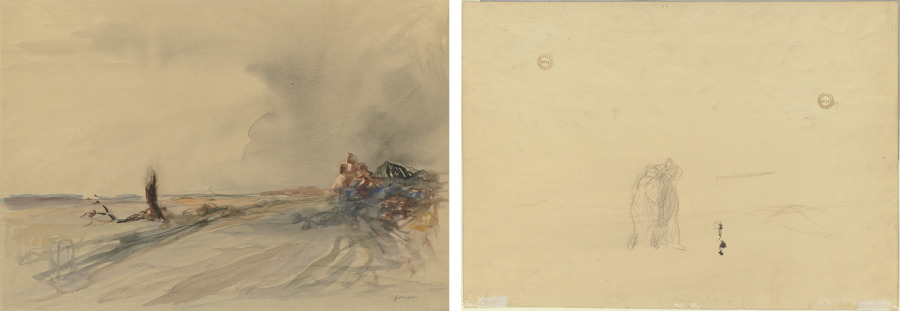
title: Devastated Land (recto); Figures in a Landscape (verso)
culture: France, 20th century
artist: Jean Louis Forain (French, 1852–1931)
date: c. 1919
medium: gray wash, watercolor, and gouache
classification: Drawing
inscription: signed, lower right, in graphite: forain ; lower right, in graphite: A2175